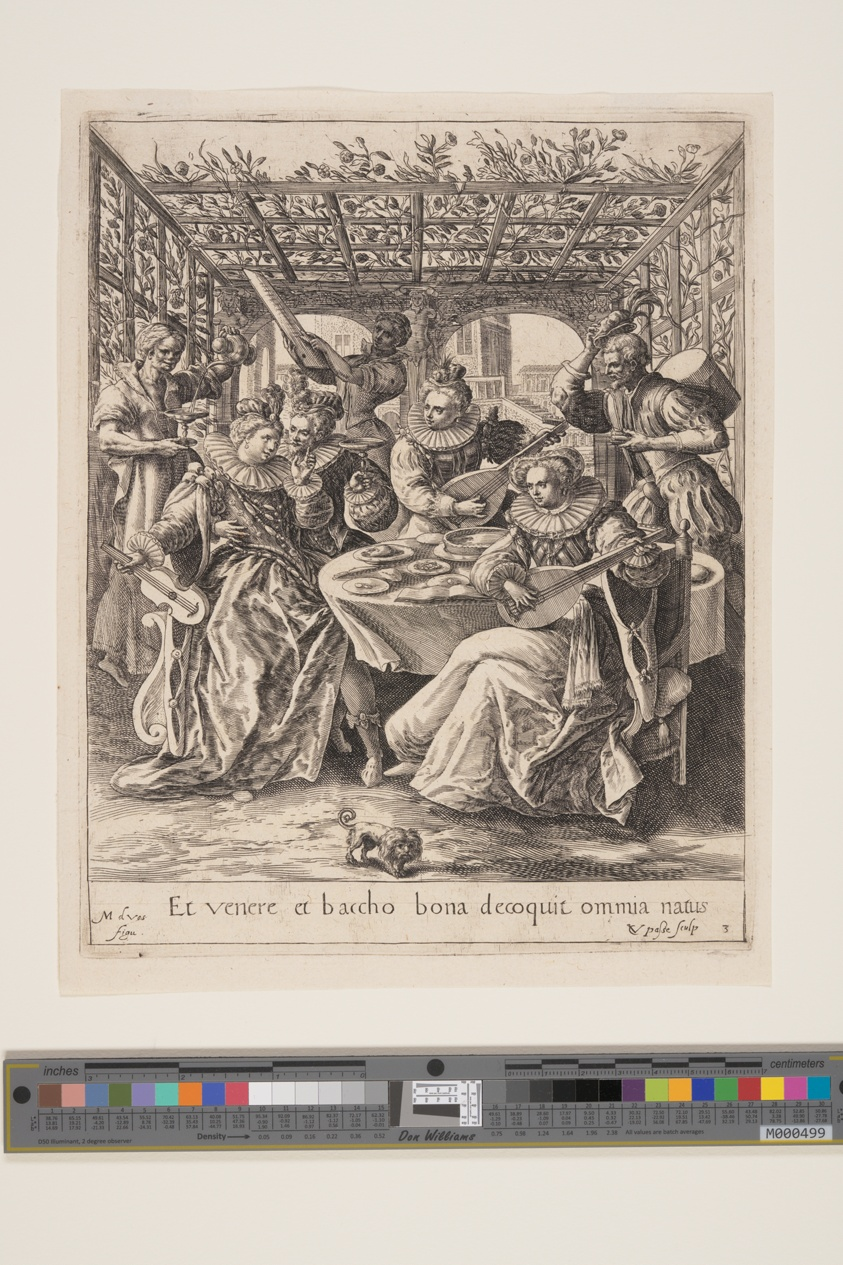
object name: Print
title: The Son Wasting his Heritage with Riotous Living, from The Parable of the Prodigal Son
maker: Crispijn van de Passe I (Dutch, c. 1565–1637); after Maarten de Vos (Flemish, 1532–1603)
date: c. 1600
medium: Engraving on ivory laid paper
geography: Netherlands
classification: engraving; paper; print; prints and drawing